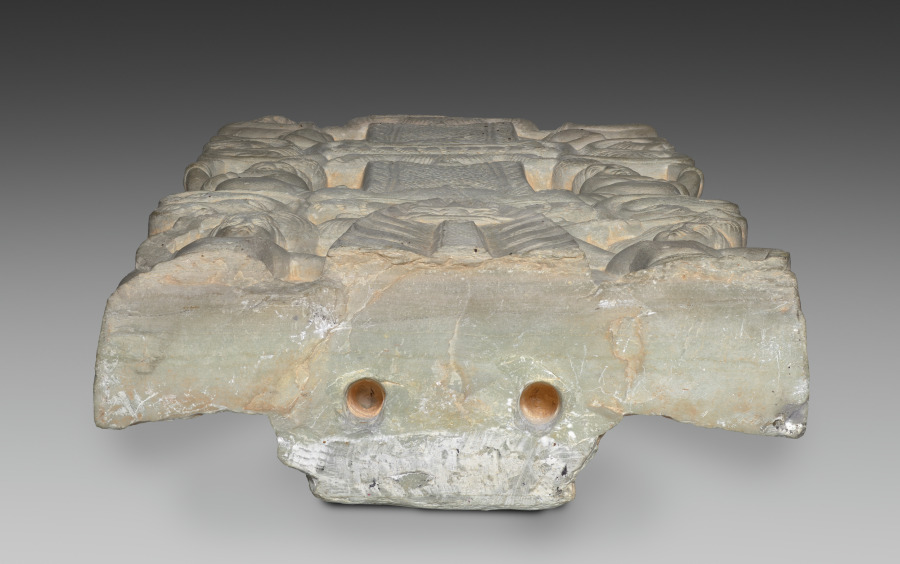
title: Veneration of the Buddha as a Fiery Pillar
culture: Southern India, Andhra Pradesh, Nagarjunakonda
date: 200s CE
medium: limestone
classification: Sculpture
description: At the bottom of this carved panel is the depiction of a pillar incised with cross-hatching and surrounded by a halo of flames. A stylized lotus and a pointed trident symbol marking good fortune and divinity crown the pillar. This image indicates the presence of the Buddha and underscores his superhuman qualities, including radiance and power to work magic. Two male figures hold fly whisks of honor on either side. Above is a golden pillar covered with jewels that the Buddha miraculously generated. Swirling leaves sprout from grooved disks at regular intervals, and celestial beings fly and dance in praise.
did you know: The acanthus leaves sprouting from the pillar echo Greco-Roman motifs.